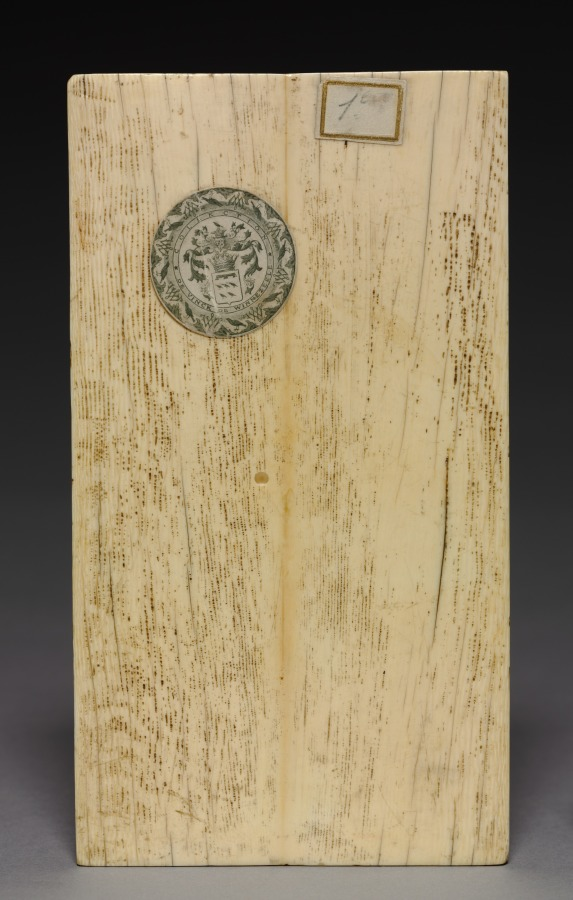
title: Diptych with Scenes from the Life of Christ (left wing: Raising of Lazarus and Crucifixion)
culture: Germany, Thuringia or Saxony, 14th century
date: c. 1350–1375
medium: ivory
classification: Ivory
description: Ivory diptychs (two panels hinged together) were used for private devotion by their aristocratic owners. The scenes represented here are Christ’s Entry into Jerusalem, the Raising of Lazarus, the Crucifixion, and Christ’s Entombment. They suggest choices made by the original owner who wished to contemplate these aspects of Christ’s passion.